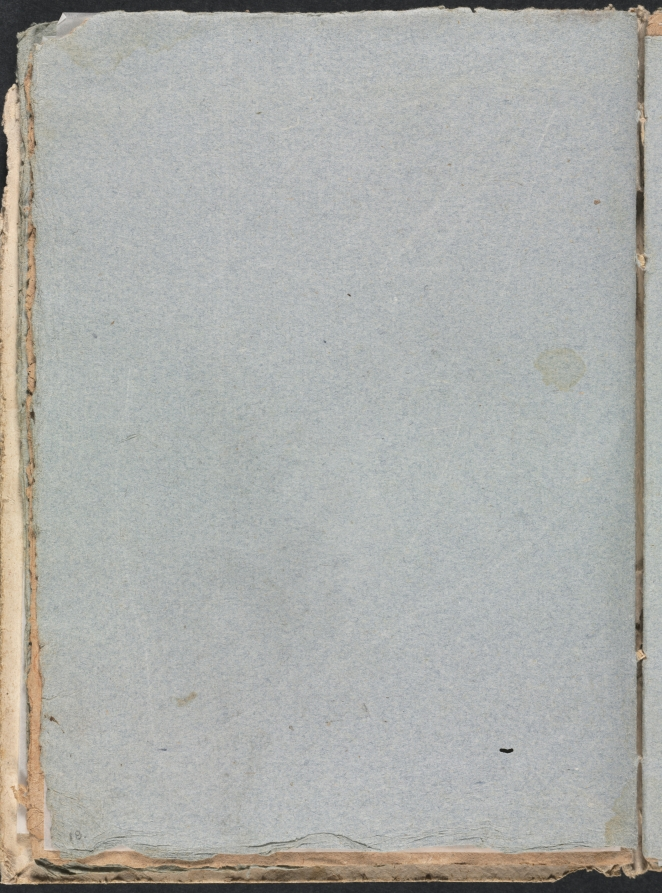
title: Verona Sketchbook: (page 18)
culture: Italy, 18th century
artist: Francesco Lorenzi (Italian, 1723–1787)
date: 1760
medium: paper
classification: Bound Volume